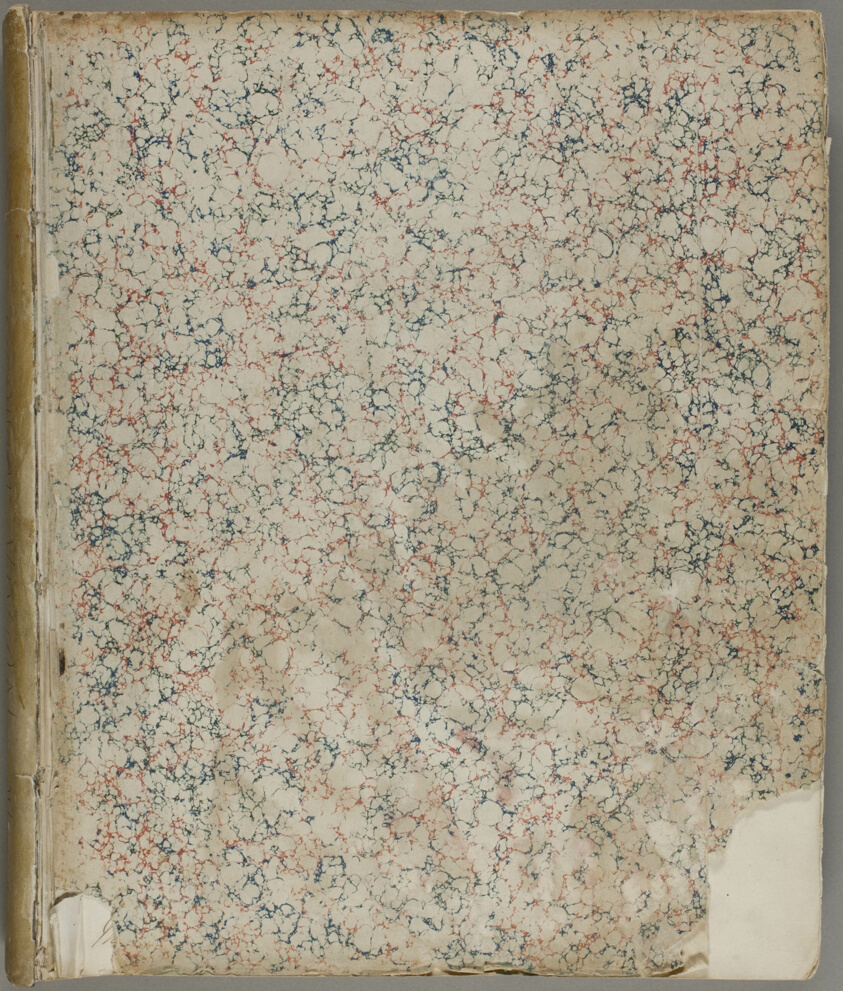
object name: Photograph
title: Untitled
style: 19th century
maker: Graham Vivian (British, active 1860s–1900)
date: 1860/1900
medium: Albumen silver prints from wet collodion negatives and platinum prints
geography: England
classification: albumen silver print; photographic process; photography; photograph